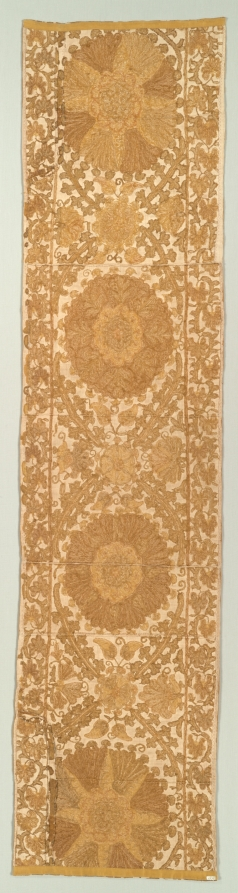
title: Panel, Probably from a Curtain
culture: Uzbekistan, Bukhara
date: 1800s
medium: embroidery: silk on cotton tabby ground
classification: Embroidery